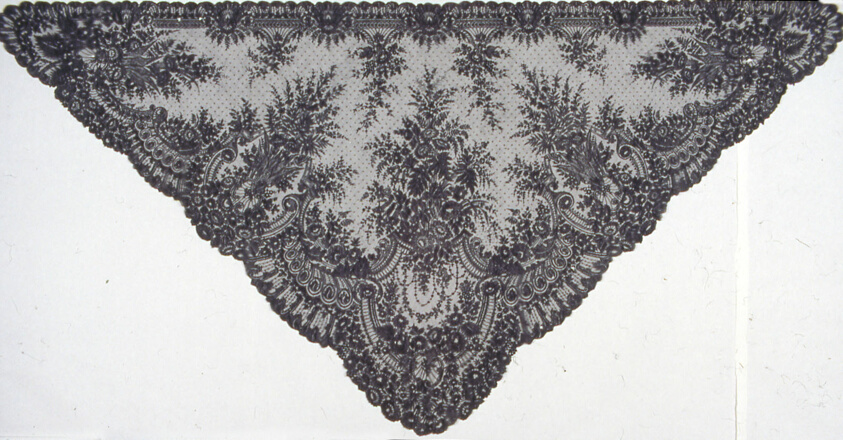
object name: Textile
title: Half Shawl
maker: Probably France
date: 1860s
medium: Silk and mohair, produced on a Pusher lace machine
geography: France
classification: textile; lace - machine; lace